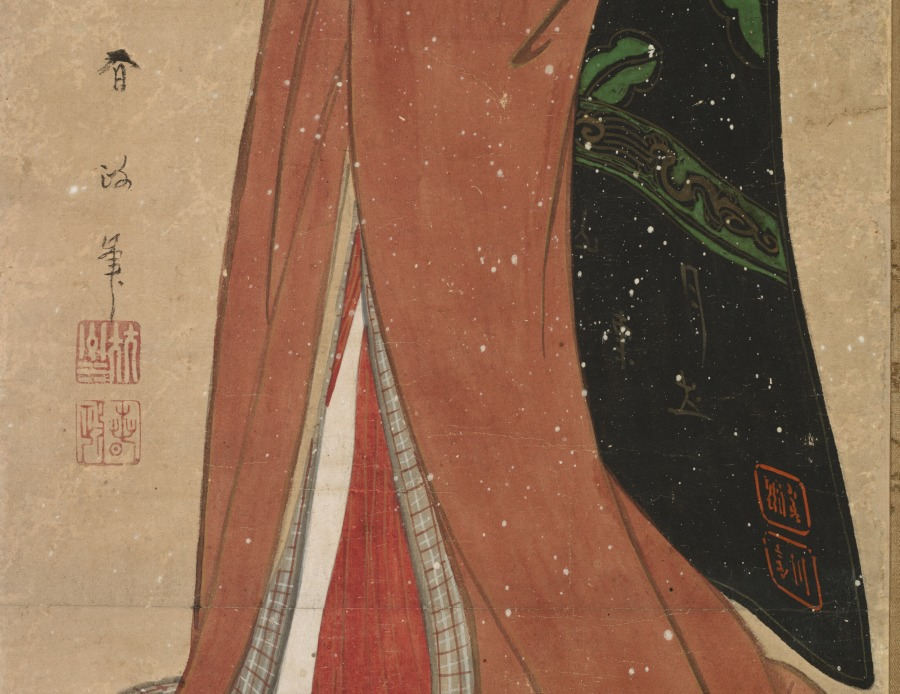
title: Lady with a Parasol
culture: Japan, Edo period (1615–1868)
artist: Koikawa Harumasa (Japanese)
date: early 1800s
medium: hanging scroll; ink, color, gold, and silver pigments on paper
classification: Painting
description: This painting depicts a young woman braving the elements as she hurries home from the local bathhouse. The action depicted accentuates her slender neck and bare legs. In later Japanese art, images of beautiful women in bare feet and a towel between their teeth have sensual overtones.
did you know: Spatters of white paint represent falling snow.